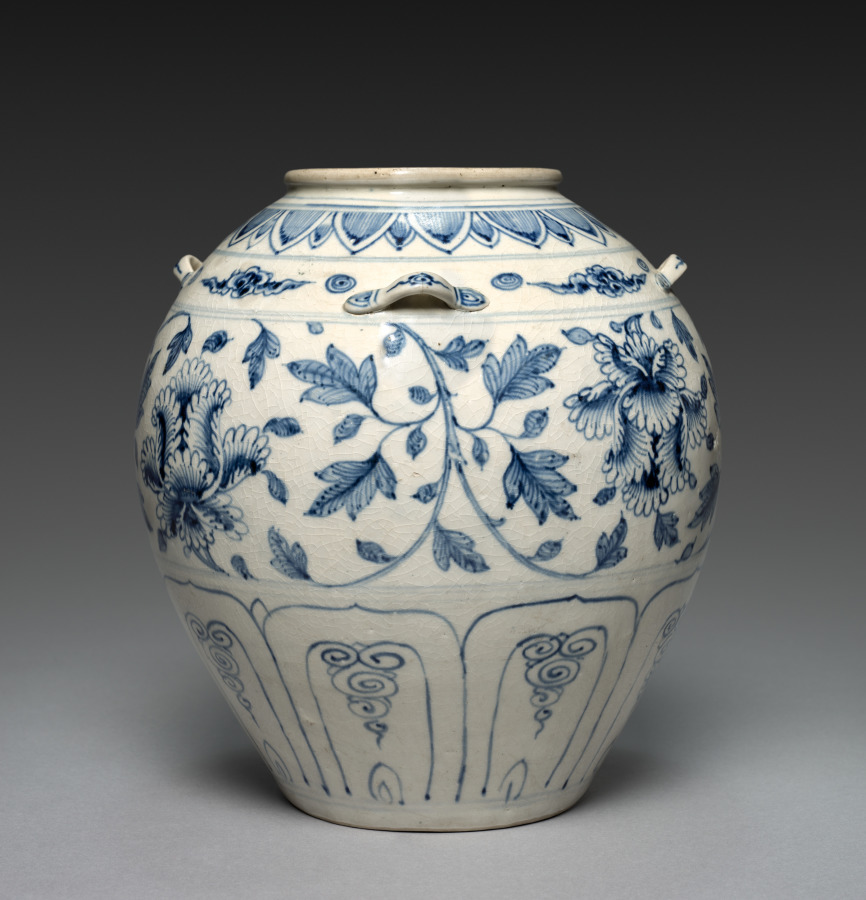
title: Storage Jar: Blue-and-White Ware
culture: Vietnam (Annam)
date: 1300s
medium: porcelain with underglaze blue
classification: Ceramic